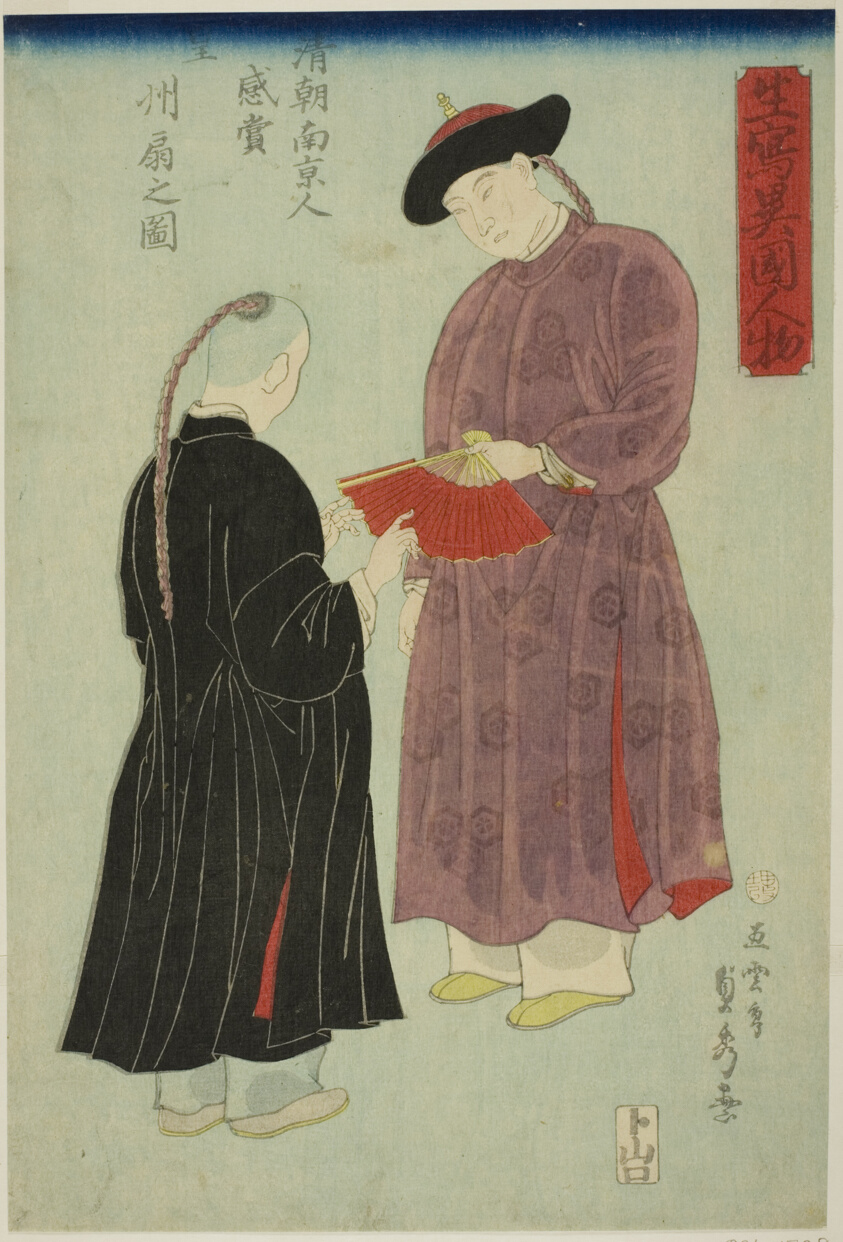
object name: Print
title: Chinese Man from Nanking Admiring a Fan (Shincho Nankinjin kansho Koshu ogi no zu), from the series "Foreigners Drawn from Life (Ikiutsushi ikoku jinbutsu)"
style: Japanese (culture or style)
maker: Utagawa Sadahide (Japanese, 1807-1873)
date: 1860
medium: Color woodblock print; oban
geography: Japan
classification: woodblock print; print; asian art